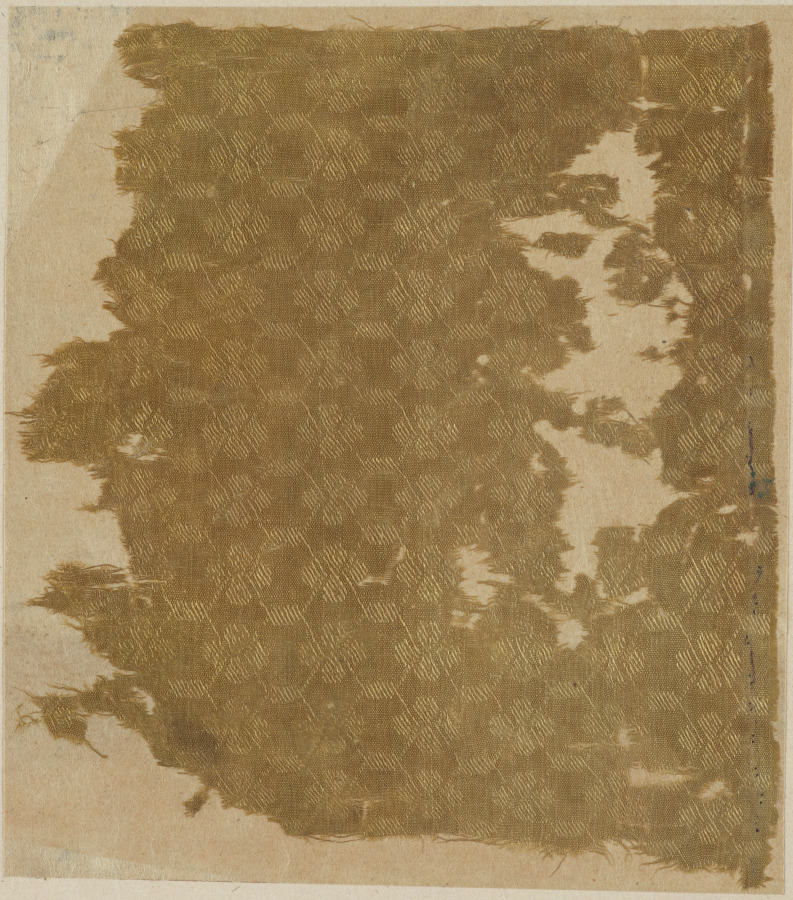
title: Fragment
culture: China, 8th century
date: 700s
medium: plain cloth, twill patterned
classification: Textile